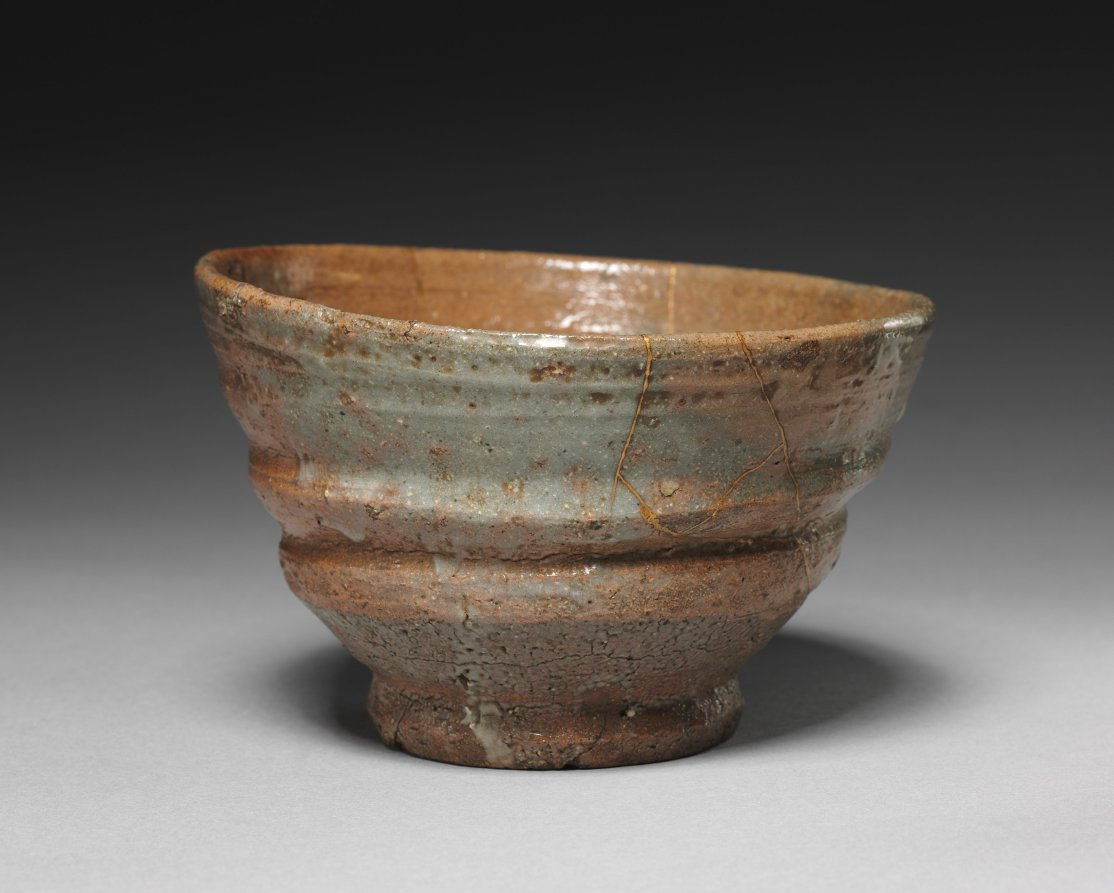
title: Tea Bowl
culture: Korea, Joseon dynasty (1392–1910)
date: 1600s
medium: glazed stoneware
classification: Ceramic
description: This type of wide-mouthed bowl was used every day in Korea, not exclusively for tea drinking. But when it was introduced to Japan around the early 16th century, its imperfect appearance, which evokes the aesthetics of wabi-sabi, caused it to be repurposed as a tea bowl. Korean tea bowls were circulated as a item of foreign luxury among Japanese military elites. This type of tea bowl may have been produced in one of the kilns established and operated by the trading office (Waegwan) in Busan, southern Gyeongsang province, as an export item for Japanese tea bowl collectors.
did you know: For its imperfect aesthetics, this type of rustic tea bowl was highly appreciated among advanced Japanese practitioners of the tea ceremony.